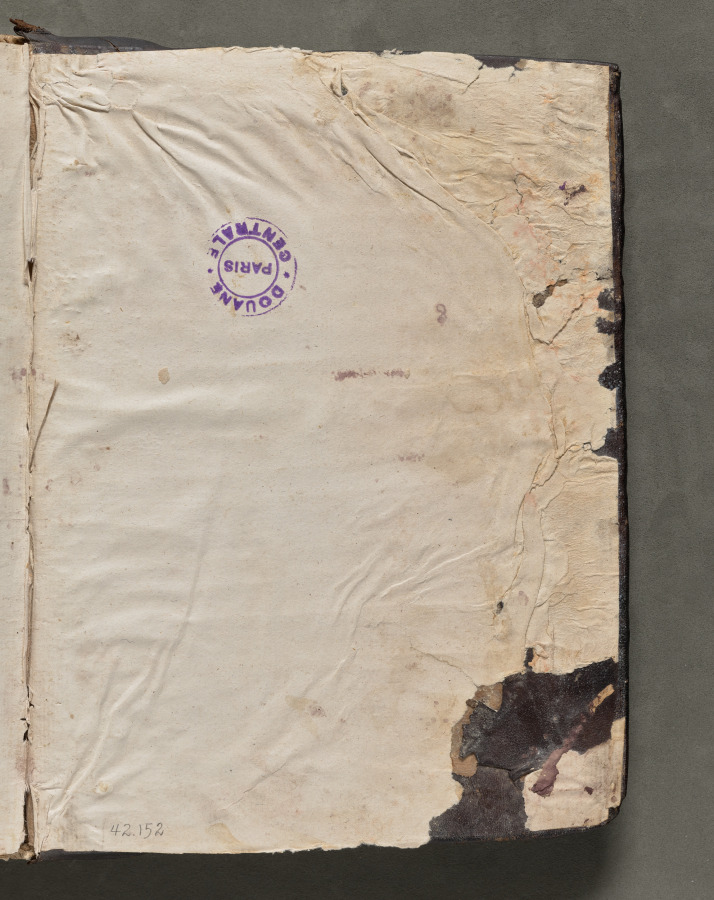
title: Text, folio 429 (recto), from a Gospel Book with Commentaries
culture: Byzantium, Constantinople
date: c. 1000–1100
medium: ink, tempera, and gold on vellum; leather binding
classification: Bound Volume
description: Each of the four gospels in this book opens on a page with brilliantly illuminated borders depicting the author of the text as well as birds—principally peacocks, symbols of the immortality of the soul—and fountains, representing the fountain of life and the salvation of the soul. This volume consists of 428 leaves with texts in Greek. Its level of sophistication suggests that it was probably written and decorated in a monastery in Constantinople.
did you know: Gospel books were carried in procession through Byzantine churches.